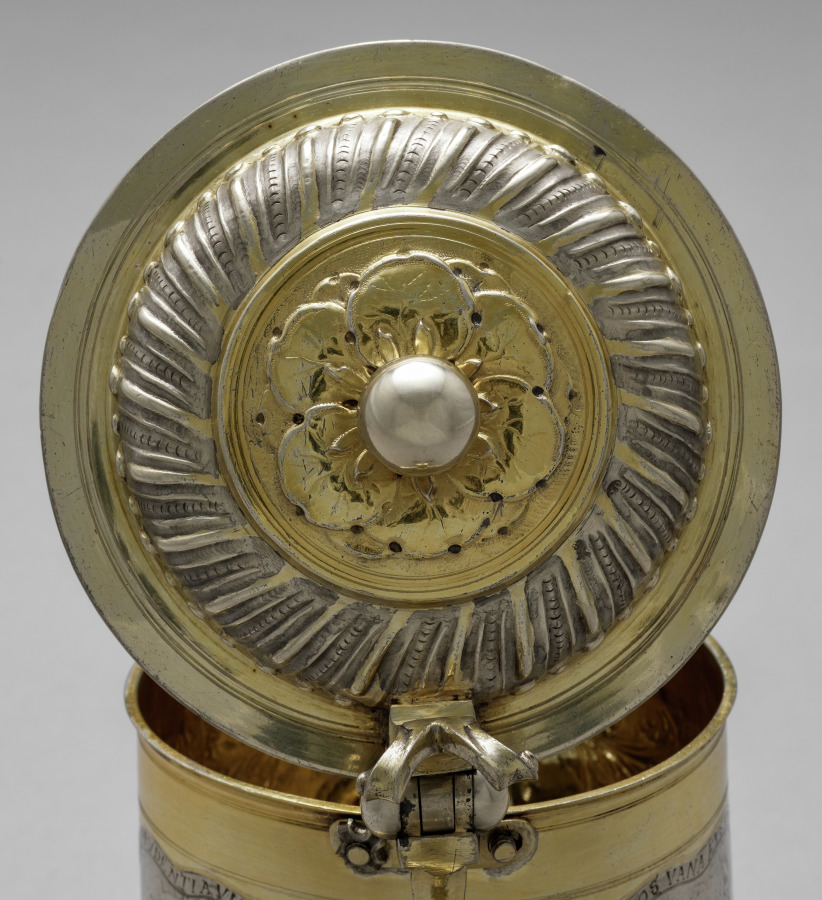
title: Tankard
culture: Germany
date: 1600s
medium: silver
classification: Silver